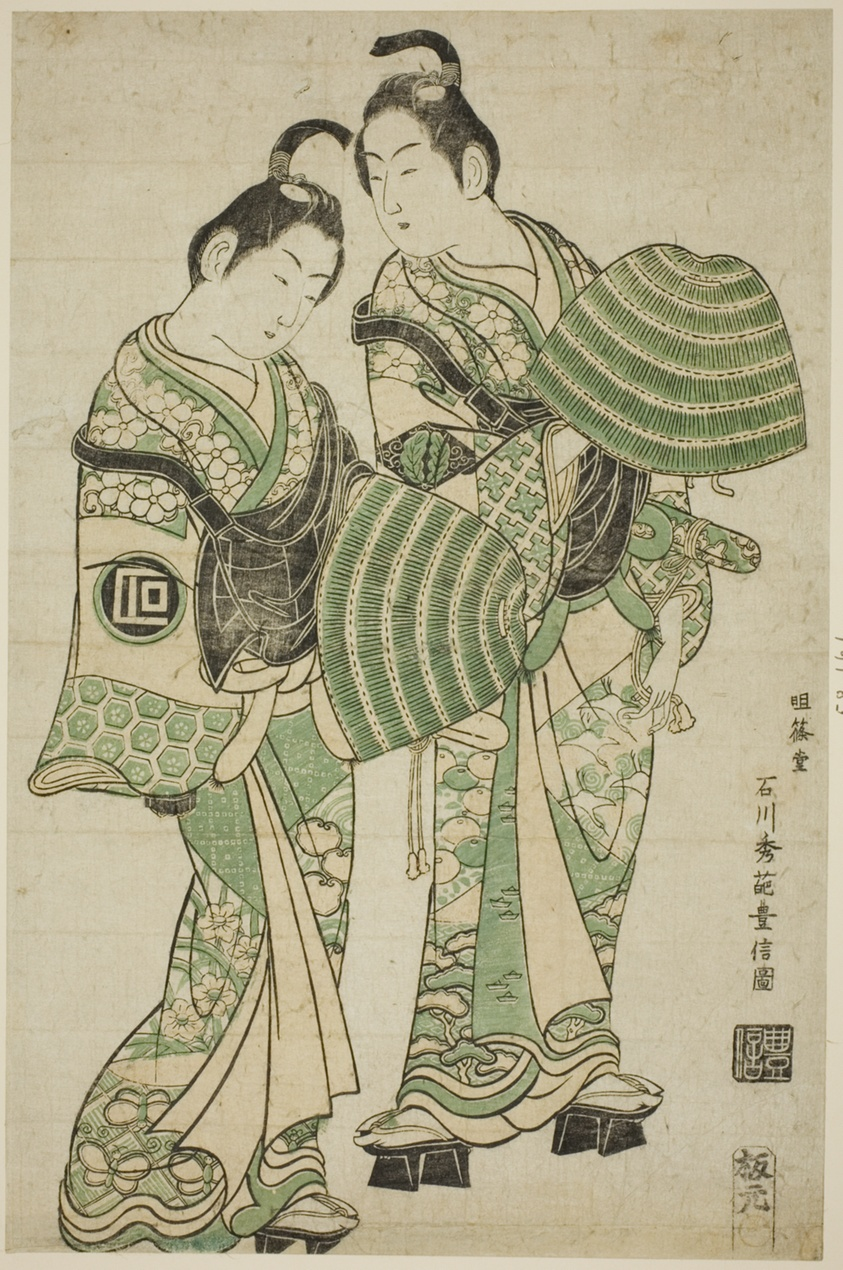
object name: Print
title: The Actors Onoe Kikugoro I and Sanogawa Ichimatsu I dressed as mendicant monks (komuso)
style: Japanese (culture or style)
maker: Ishikawa Toyonobu (Japanese, 1711-1785)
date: c. 1749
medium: Color woodblock print; oban, benizuri-e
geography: Japan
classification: woodblock print; print; asian art